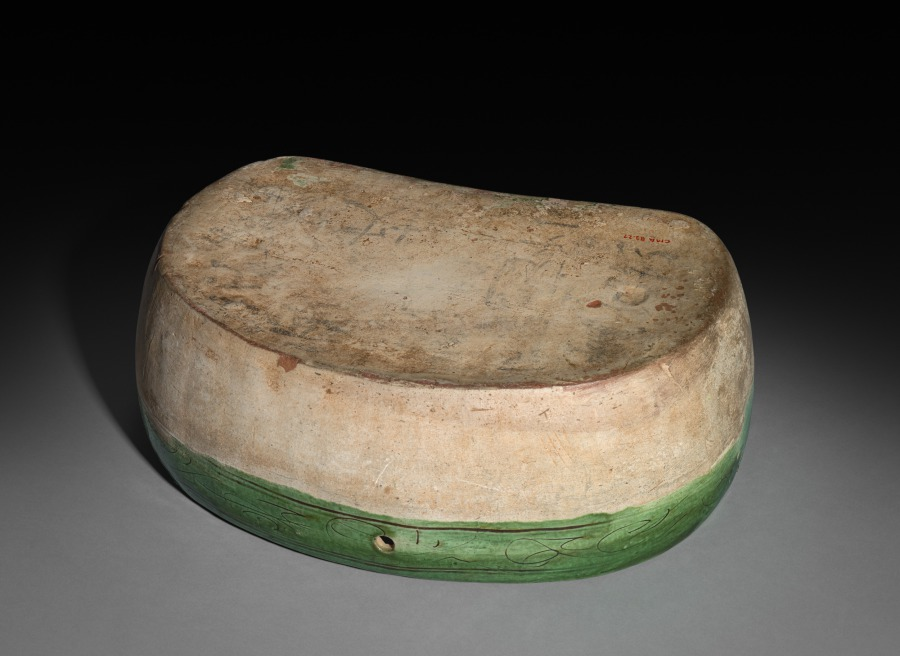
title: Pillow with Mandarin Duck: Cizhou Ware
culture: China, Jin dynasty (1115-1234)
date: 12th-13th Century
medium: earthenware, incised and slip-coated with three color glaze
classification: Ceramic